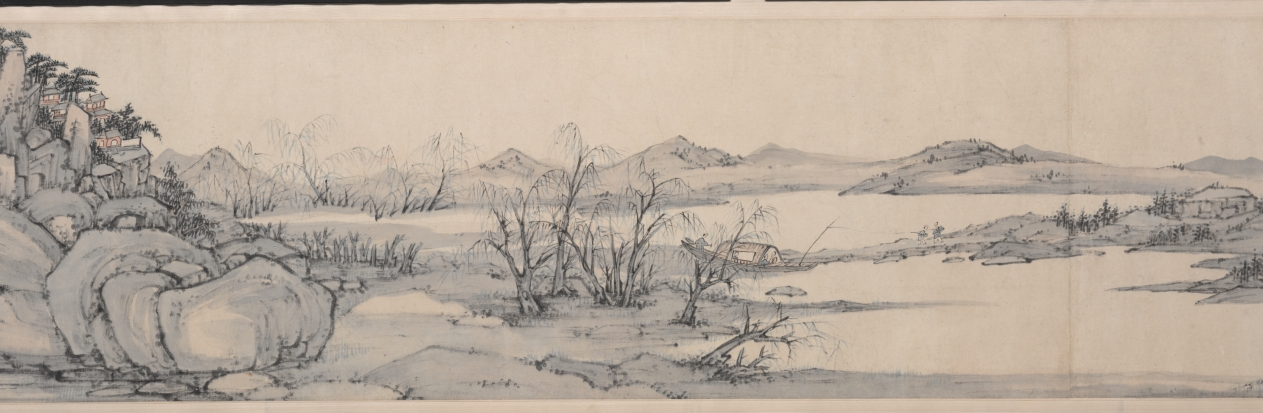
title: Pure Tones among Hills and Waters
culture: China, Qing dynasty (1644-1911)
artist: Xiao Yuncong (Chinese, 1596–1673)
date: 1664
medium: Handscroll; ink and light color on paper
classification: Painting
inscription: 種松發秀色，具是高人心。/ 鑿石築茅屋，長年覆綠陰。/ 白雲無意出，舒卷趨空林。/ 萬籟時一寂，微風墮清音。/ 此情莫可擬，此景誰能論。/ 只向千峰裏，共彈五絃琴。/ 桃花依綠水，不覺又春深。 甲辰花朝題于青蓮閣, 鐘山老人蕭雲從。[印] 鐘山老人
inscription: Title and inscription, dated 1744, and 3 seals of Shen Feng 沈鳳 (1685-1755).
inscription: 4 colophons and 24 additional seals: 1 colophon, dated 1811, and 5 seals of Xiang Yuan 項源 (active about 1811); 1 colophon, dated 1858, and 2 seals of Qi Junzao 祁寯藻 (1793-1866); 1 colophon and 4 seals of Zhang Yunzhong 張允中 (1881–1960?); 4 seals of Jiang Xun 江恂 (active about 1753–after 1780); 1 colophon dated 1943, and 2 seals of Wang Shaoming 汪兆銘 (Wang Jingwei 汪精衛, 1883–1944); 1 seal of Qi Zhiliu 祁之鏐 (active about 1858); 2 seals of Yu Zhimeng 俞芷盟 (second half of 19th century); 4 seals unidentified.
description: Painted at age 68, this landscape is one of Xiao Yuncong’s most mature works. Extraordinary in its combination of fine details with bold brushstrokes and bluish washes, it is also one of his longest compositions in handscroll format, extending over 23 feet. Throughout his lifetime, Xiao visited Nanjing and Yangzhou, where he met with other painters and literati. Regarded as the founder of the Gushu school (姑孰派) of painting, Xiao painted from nature, and his landscapes are informed by his travels, as well as by his experience as a print designer.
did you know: Biographical notes on Xiao Yuncong relate that he did not pursue the career of an official, but "furnished a cottage in the eastern suburbs [of Wuhu in Anhui province] and amused himself playing the qin (zither) and reading every day."